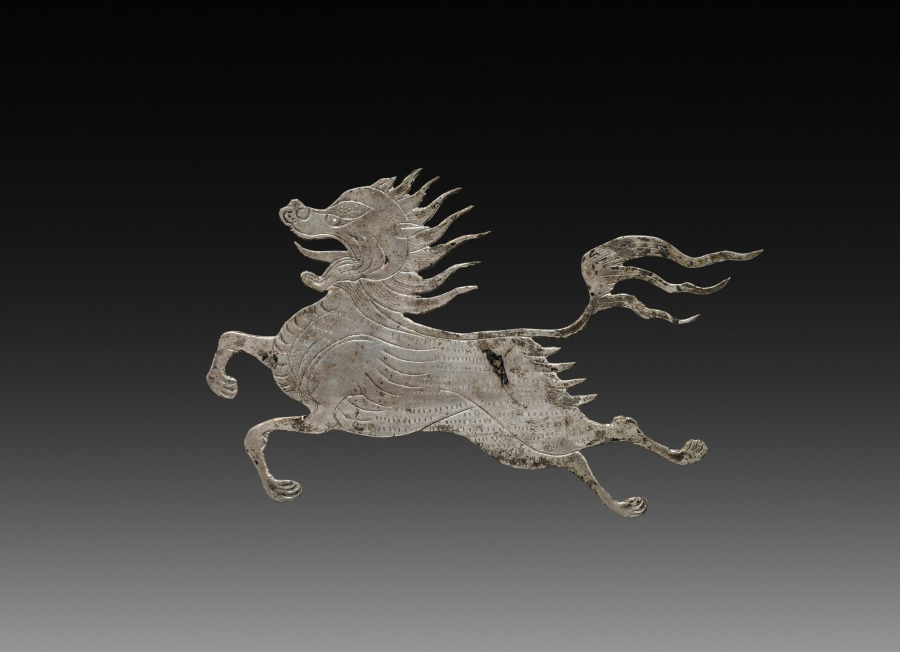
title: Inlay for a Mirror or Box: shih-shih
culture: China, Tang dynasty (618-907) - Song dynasty (960-1279)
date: c. 900–1000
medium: beaten silver with chased details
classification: Metalwork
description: The p'ing-t'o technique of inlaying gold and silver foil on lacquer produced luxurious articles of elegance and fragility. These stray silver inlays were originally mounted on a mirror back or a cosmetic box whose lacquered surface has disintegrated. They combine auspicious symbols of Indian and Chinese origin--human-headed birds whose melodies filled the Buddhist paradise, and bird-riding deities who inhabited the skies of Taoist mythology. Like these imaginary beings, the lions were probably paired in a radial design; at least one has been lost.